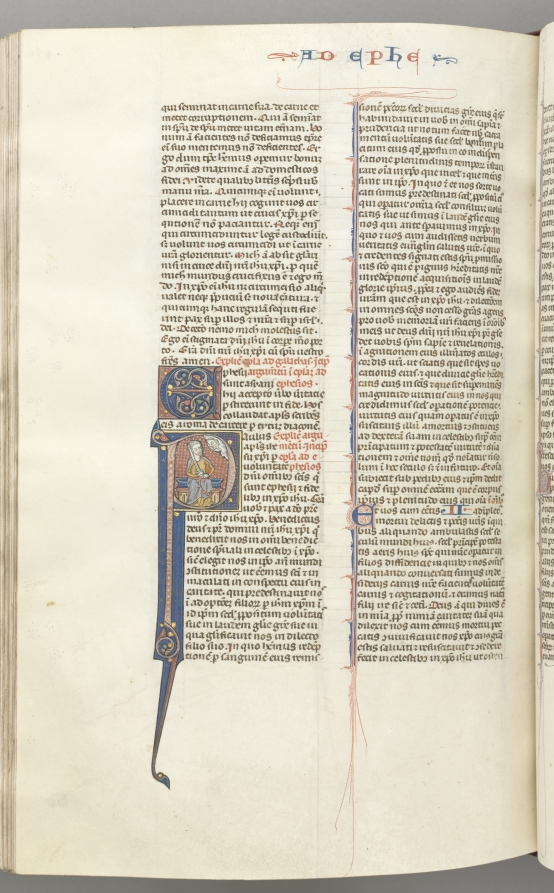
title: Fol. 450v, Ephesians, historiated initial P, Paul seated with a sword, the bust of God above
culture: Southern France, Toulouse(?), 13th century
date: c. 1275–1300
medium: ink, tempera and gold on vellum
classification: Bound Volume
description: Biblical manuscripts were highly prized and important possessions of churches, monasteries, cathedral schools, and universities throughout medieval Europe. The biblical texts were known as the vulgate, the translations made by Saint Jerome in the fourth century from Hebrew and Greek into Latin, which became the definitive and official Latin version of the Roman Church. In the 13th century, the bible was, for the first time, produced as a single volume with an officially sanctioned sequence to its books and chapters as illustrated by this example. The very extensive decoration of this bible is arranged hierarchically to indicate the relative importance of the various texts so that full or almost full-page initials mark the openings of the first prologue, Genesis, and the first Gospel; historiated initials mark the beginning of each book and illuminated initials mark the Prologues.